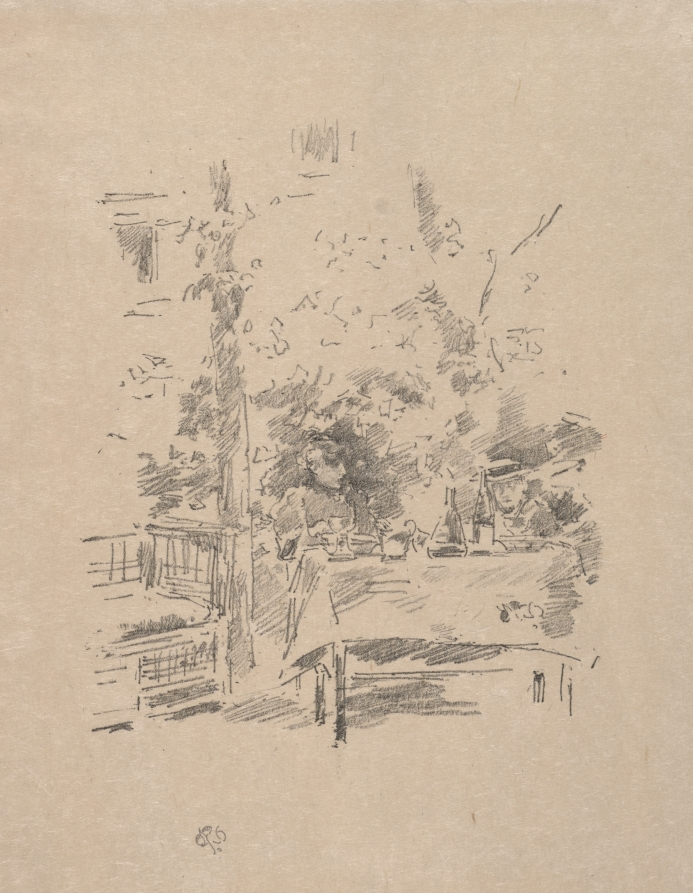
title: Tête-à-tête in the Garden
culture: America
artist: James McNeill Whistler (American, 1834–1903)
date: 1894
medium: lithograph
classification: Print